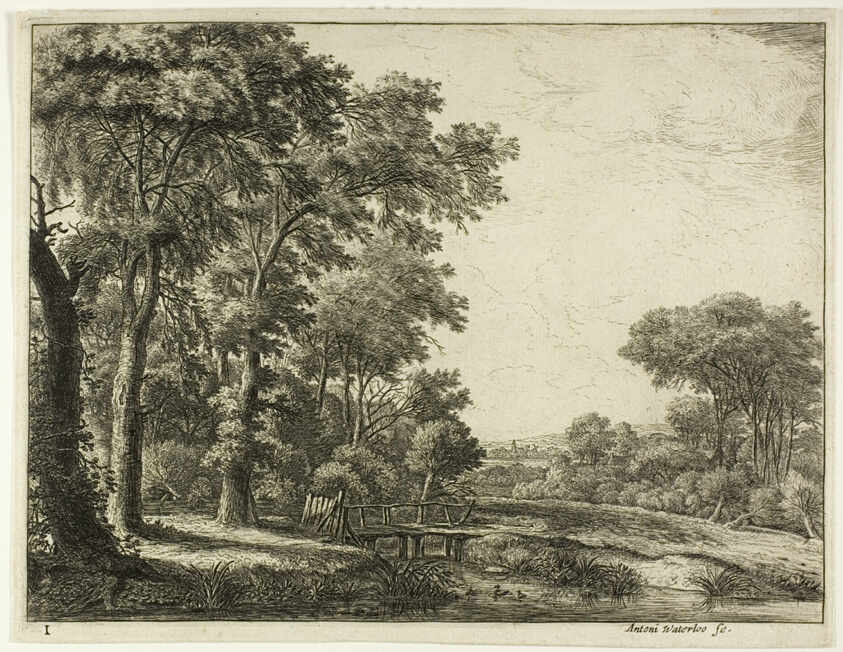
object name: Print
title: The Entrance to the Forest by the Little Wooden Bridge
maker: Anthonie Waterloo (Dutch, c. 1610-1690)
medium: Etching on paper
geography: Holland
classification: etching; print; prints and drawing